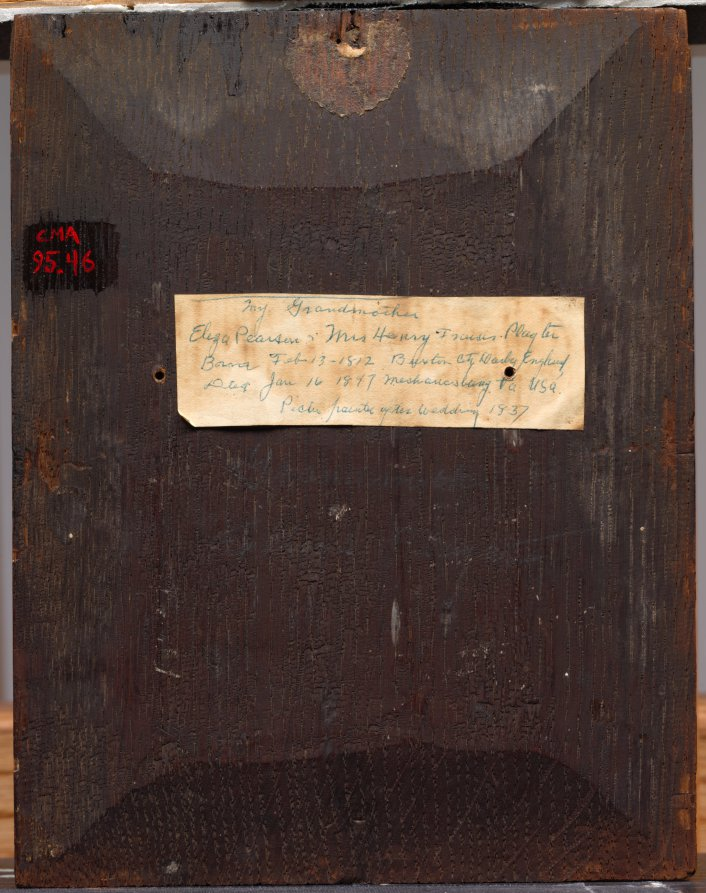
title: Elisa Pearson Playter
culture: Netherlands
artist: Pieter Christoffel Wonder (Dutch, 1780–1852)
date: c. 1837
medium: oil on wood panel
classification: Painting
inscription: Signed in black paint in upper right corner: P.C.W.